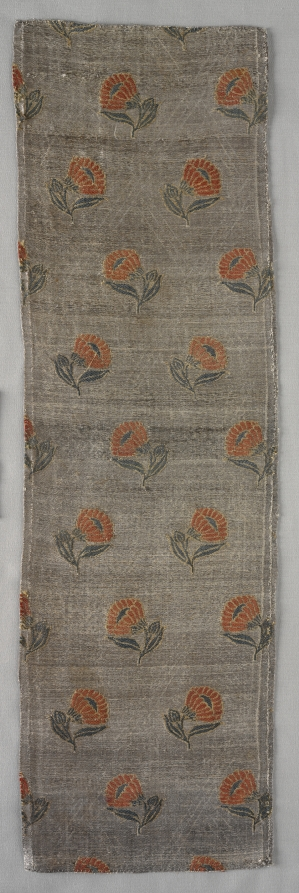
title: Fragment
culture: Iran, 17th century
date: 1600s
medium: compound twill weave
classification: Textile